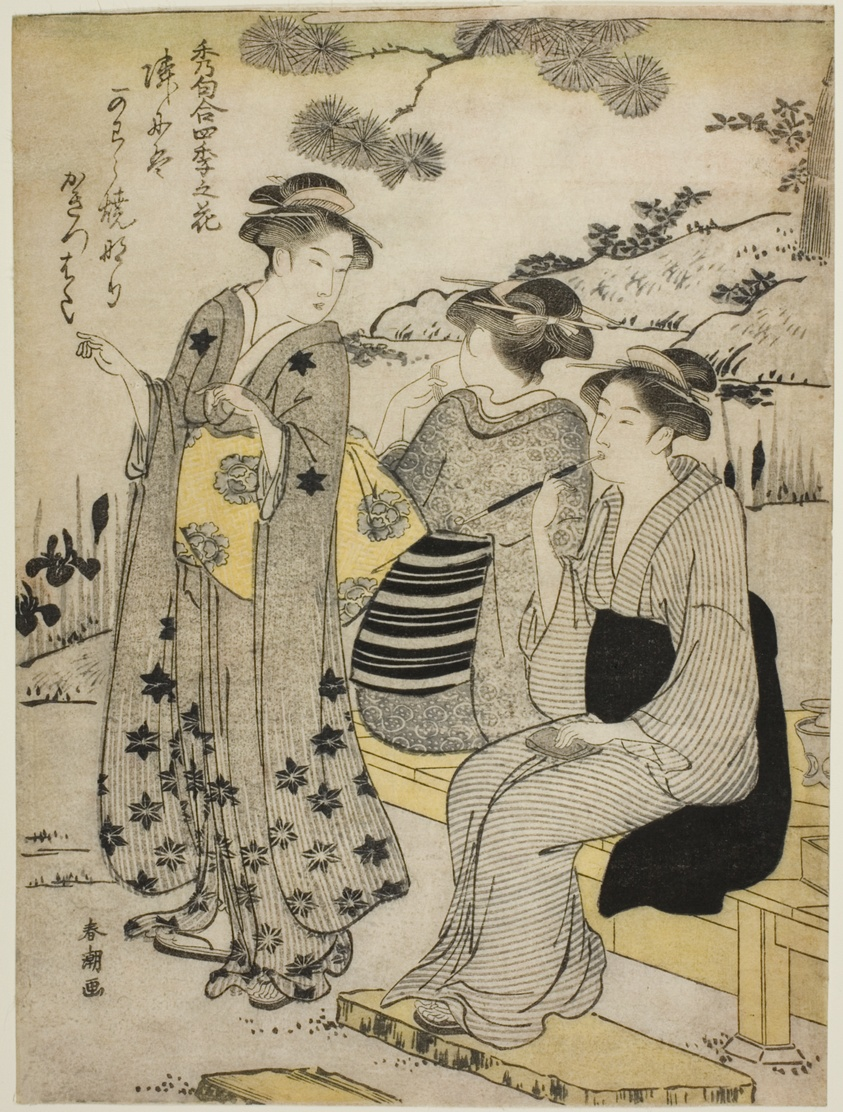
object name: Print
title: Rabbit-Ear Irises in Autumn, from the series "Choicest Odes upon Flowers of the Four Seasons (Shuku awase, shiki no hana)"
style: Japanese (culture or style)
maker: Katsukawa Shuncho; Japanese, active c. 1780-1801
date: c. 1792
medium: Color woodblock print; chuban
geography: Japan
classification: woodblock print; print; asian art